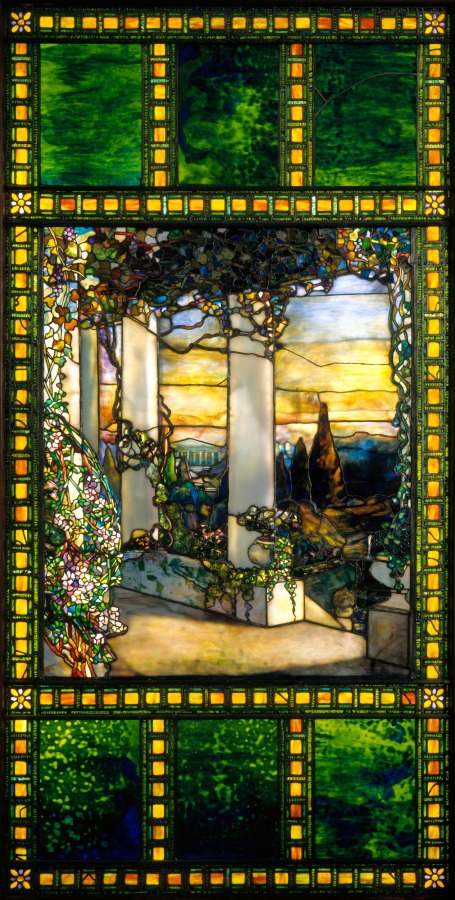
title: Hinds House Window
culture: America, New York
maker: Tiffany Glass & Decorating Company (America, New York, 1892–1902)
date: c. 1900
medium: leaded glass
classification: Glass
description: In this window commissioned for the Howell Hinds house around 1900, thousands of richly colored glass pieces have been arranged and layered to paint an idyllic three-dimensional scene that would have warmly glowed in the afternoon sunlight. Located at 2200 Overlook Road in Cleveland, Ohio, the house was demolished in 1930 in a similar fate as other nearby estates. Photographs show the placement of the window in the drawing room next to the fireplace as well as the opulent interiors Louis Comfort Tiffany designed for the library and dining room.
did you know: This window incorporates layered pieces of glass, producing shadows and creating a multidimensional quality.